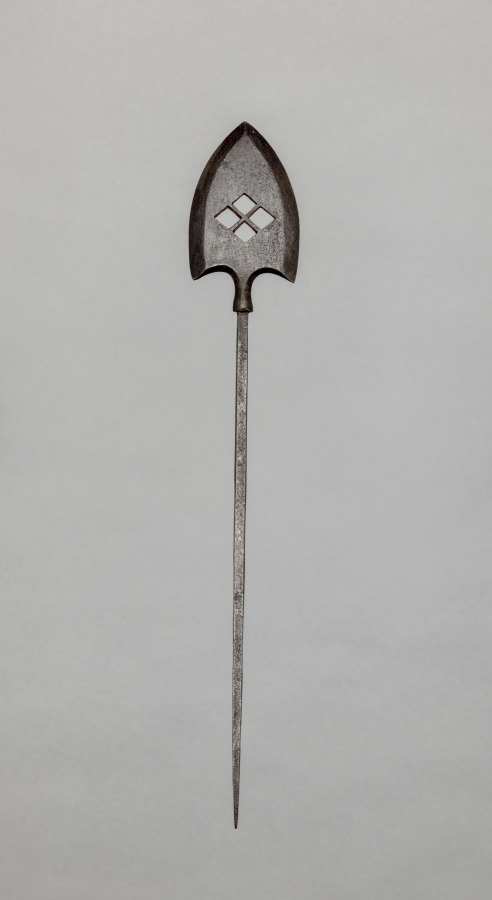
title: Arrow Head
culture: Japan, Edo period (1615–1868)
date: 1600s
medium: iron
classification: Arms and Armor